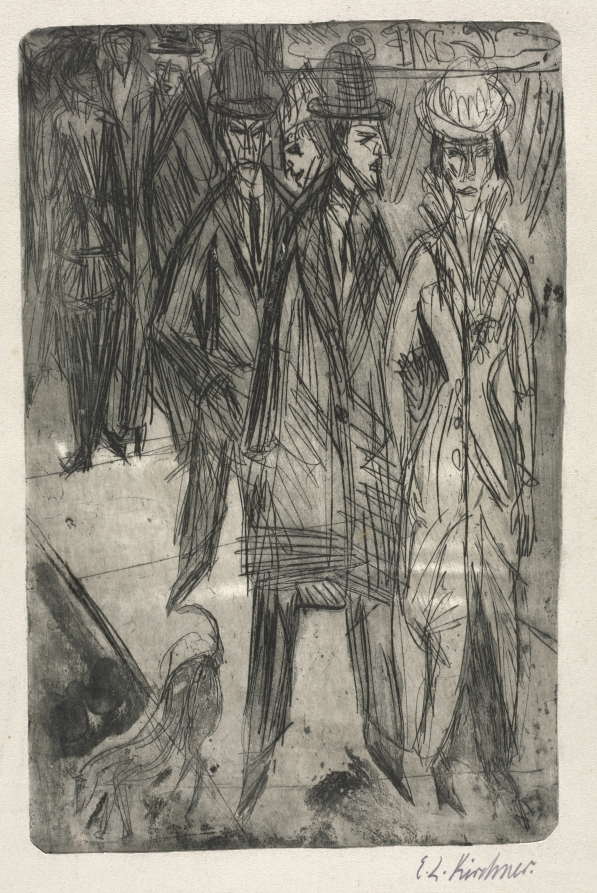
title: On the Street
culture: Germany, 20th century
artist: Ernst Ludwig Kirchner (German, 1880–1938)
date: c. 1914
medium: etching and aquatint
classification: Print